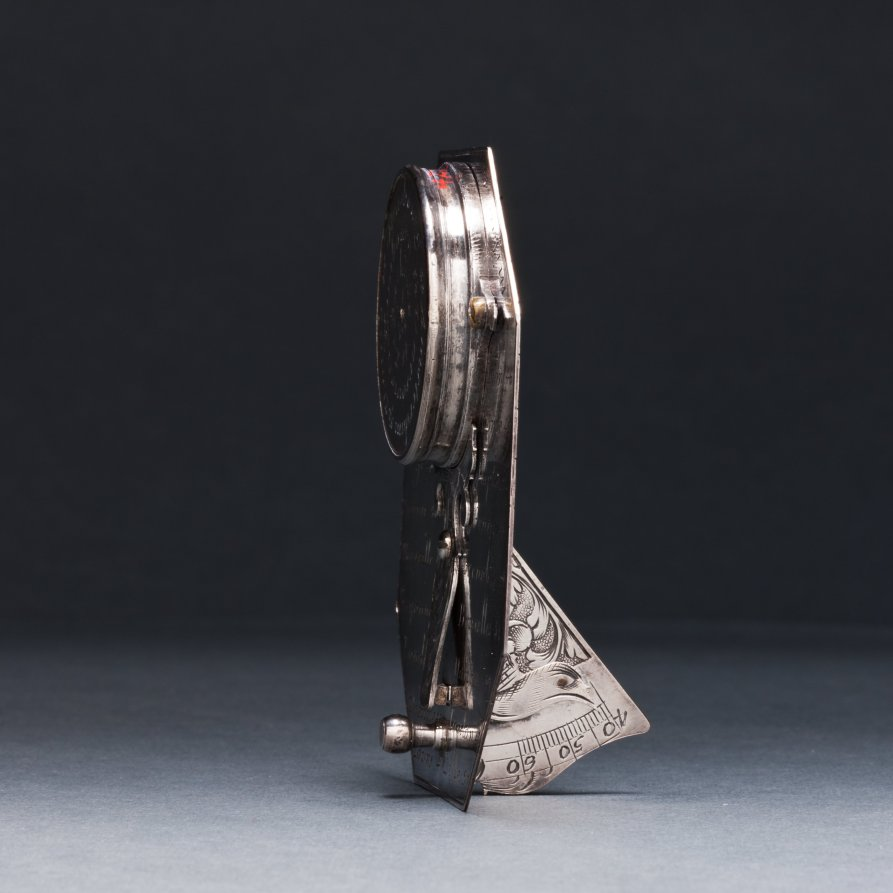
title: Butterfield Sundial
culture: France, 18th century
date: 1700s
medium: silver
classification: Silver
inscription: [Engraved signature above the compass in ribbon band]: "N. BION A Paris"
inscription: [Engraved on the face of the sundial]: “Pour 55° 4-5-6-7-8-9-10-11 50° IIII-V-VI-VII-VIII-IX-X-XI 45° 5-6-7-8-9-10-11 40° -VI-VII-VIII-IX-X-XI'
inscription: [Engraved on the other side]: "Pour 55° -8-7-6-5-4-3-2-1-0 50°-VIII-VII-VI-V-IIII-III-II-I 45°-8-7-6-5-4-3-2-1 40°-VII-VI-V-IIII-III-II-I"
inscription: [Engraved around the compass]: “NORD-OUEST-SUD-EST”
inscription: [Engraved on the back of the sundial]: “Turin 44 Milan 46 Paris 49 Lion 46 Metz 49 Rome 42 Liege 51 Naples 44 Namur 50 Gennes 44 Marseille 43 Grenoble 45 Bayonne 43 Bruxelle 51 Londres 52 Nantes 47 Vienne 48 Toulon 43 Tours 47 Lille 51”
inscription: [Engraved around the back of the compass]: “Venise 45 Strasbourg 49 Amsterdam 52 Hambourg 54 Varsovie 52 La Rochelle 46”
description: Butterfield-type sundials are characterized by their adjustable gnomons, metal flaps that cast a shadow on the dial’s face to indicate the hour, and geographical indices. This sundial has a scale adjustable between latitudes of 40° to 60° north. The latitudes of 26 European towns are engraved on its back for quick reference. With an intricately engraved silver face, it would have functioned as a fashionable traveler’s accessory.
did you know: Butterfield-style sundials were named after Micheal Butterfield, an English scientific and mathematical instrument maker who worked in Paris between 1674 and 1724.